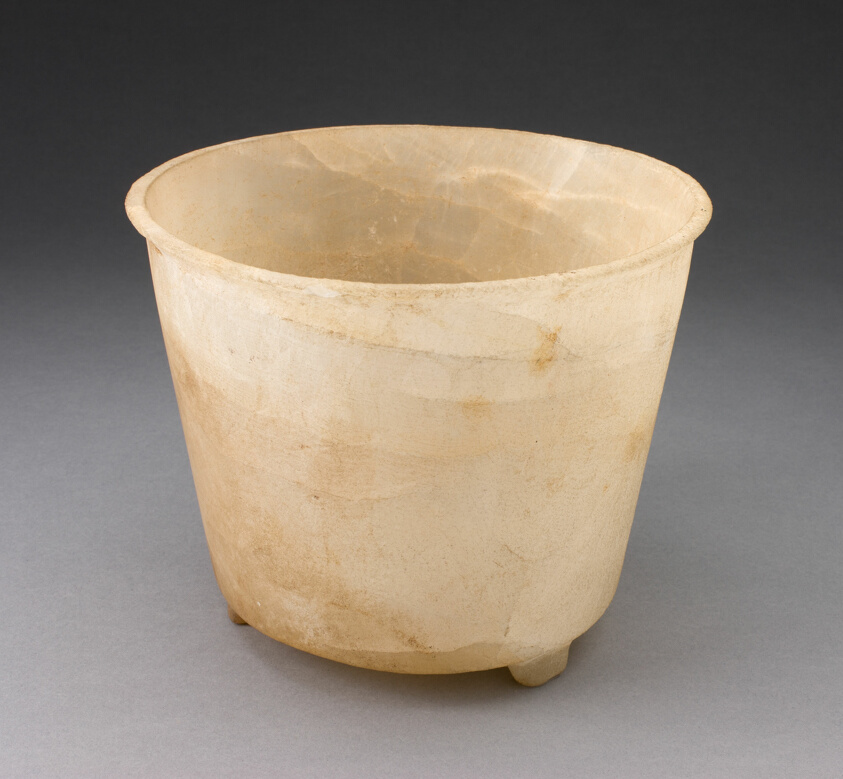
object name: Vessel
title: Tripod Vessel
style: mixtec, oaxacan, mesoamerican, Pre-Columbian, americas, Arts of the Americas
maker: Mixtec (Oaxaca, Mexico)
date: c. 200 CE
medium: Alabaster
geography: Oaxaca state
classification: vessel; art of the americas